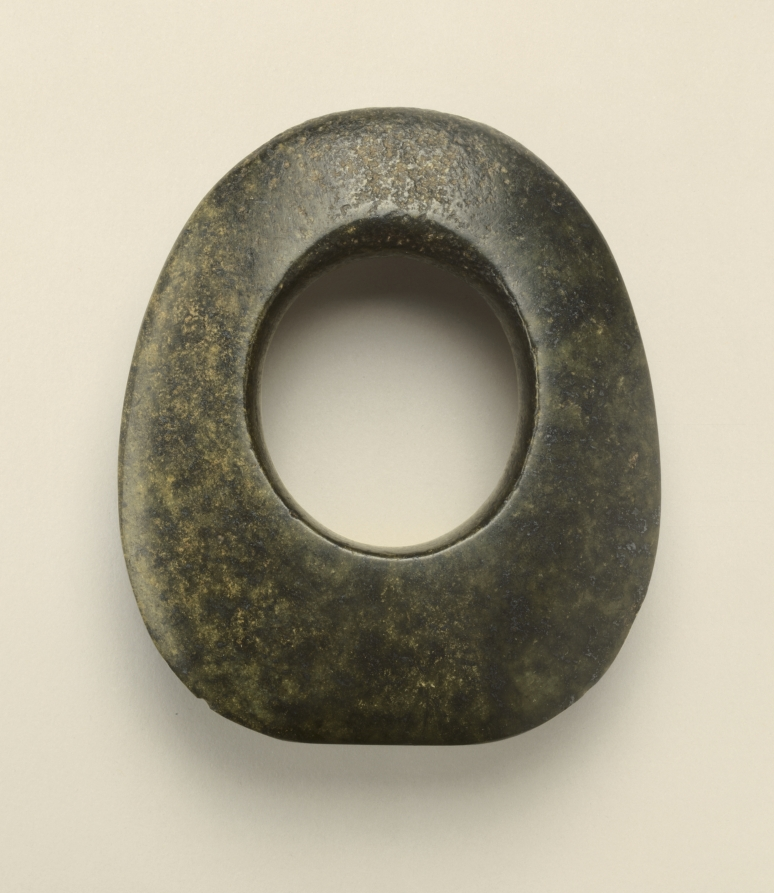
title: Ceremonial Disk-Axe (Yue)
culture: Northeast China, Neolithic period, Hongshan culture (4700–2920 BCE)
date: c. 4700–2920 BCE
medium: serpentine stone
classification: Jade